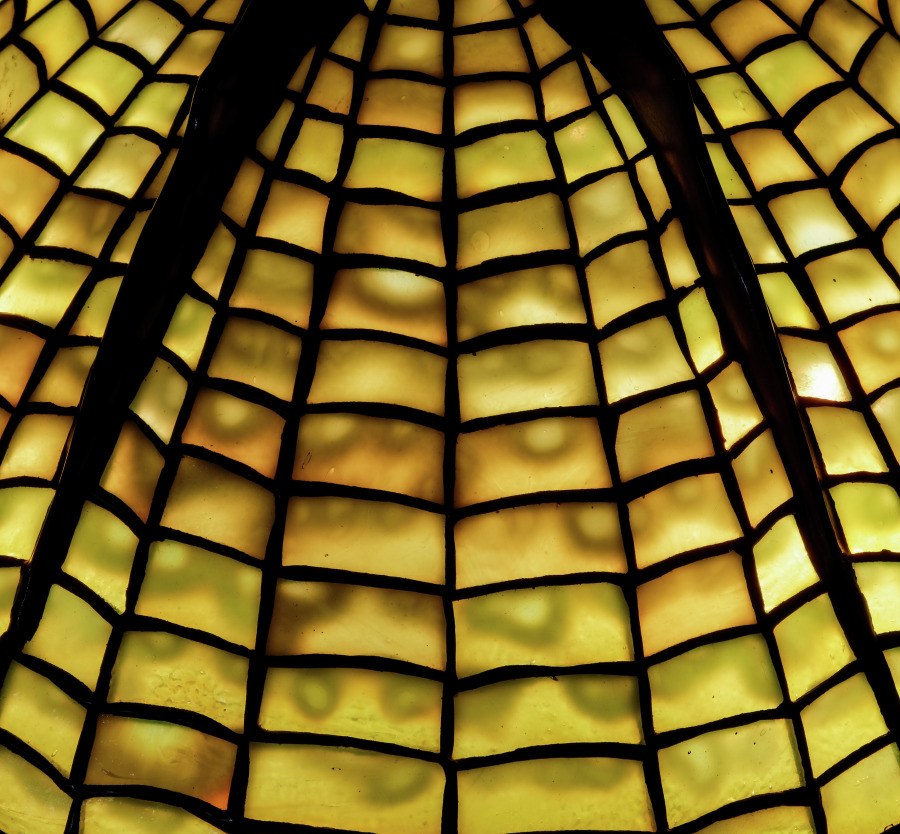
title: Spider and Web Table Lamp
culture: America, New York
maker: Tiffany Studios (United States, New York, 1902–32)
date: c. 1902–20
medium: Leaded glass, bronze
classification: Lamp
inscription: Shade impressed: TIFFANY STUDIOS NEW YORK 1424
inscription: Base impressed: TIFFANY STUDIOS/NEW YORK/337/ 2844 [scratched]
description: The dawn of the 20th century spurred fresh approaches to design. Louis Comfort Tiffany’s great contribution to this new art movement, termed the Art Nouveau, was not only the shimmering iridescence of his Favrile glass but also the naturalistic compositions of his lamps and windows, which brought him commercial and critical success in both Europe and America. Symbolic themes, such as the lurking spider in his web of this lamp, were a hallmark of Tiffany's Art Nouveau design.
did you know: The base of this lamp resembles an upturned mushroom.